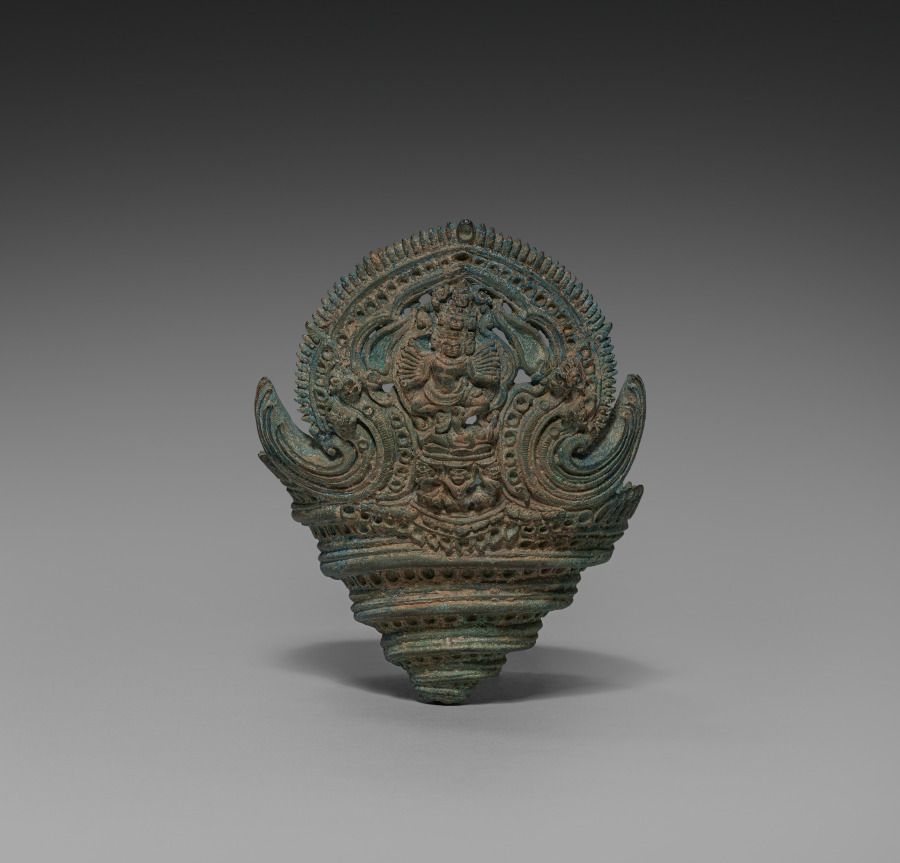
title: Ritual conch shell base with dancing Hevajra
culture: Cambodia, Khmer, Angkor Period, 12th-13th Century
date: 1100s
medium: shell and bronze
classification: Sculpture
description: A royal temple like Banteay Chhmar was built for performing rituals and to honor images of gods, Buddhas, and other sacred or enlightened beings for the sake of the kingdom’s protection and ongoing prosperity. Conch shells were blown at the start of rituals to make the sound corresponding to the syllable om. The dancing figure of Hevajra, a Buddhist being of enlightenment with eight heads, sixteen arms, and four legs, has been worked into the bronze embellishment of the shell. Hevajra was elevated to a prominent position in Khmer Buddhism of the Angkorian period as the standard figure denoting the practice of rituals prescribed in a text called the Hevajra-tantra. The tripod stand with three serpents is probably not original to the shell.